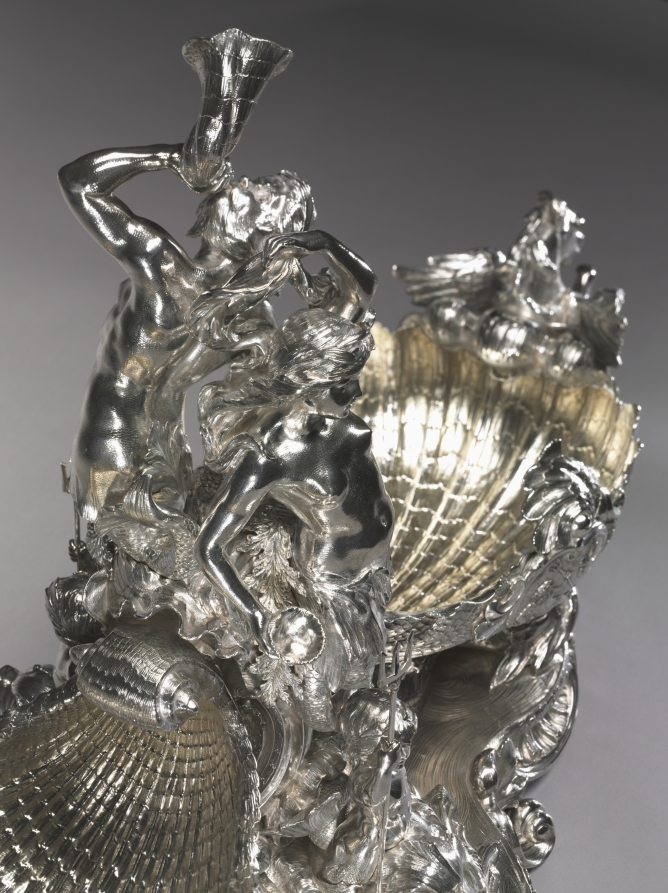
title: Centerpiece from the Nereid Service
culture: England, late 19th-early 20th century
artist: Goldsmith's & Silversmith's Company (British)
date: c. 1900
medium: silver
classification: Silver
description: Originally thought to have been made by the early 19th-century London silversmith Paul Storr because it had been marked with spurious Storr hallmarks, more recent scholarship has revealed that this service, representing the triumph of Great Britain on the high seas through the allegorical images of Grecian nymphs (nereids), was actually made to display at the 1900 world's fair in Paris. Such nationalistic fervor permeated design at the turn of the 20th century, especially in the years leading up to the First World War, when national pride was brought to its heels in Europe through a devastating conflict.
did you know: This centerpiece is actually the product of many hands since the Goldsmiths' and Silversmiths' Company operated as a cooperative of silversmiths who sold their work through the company.